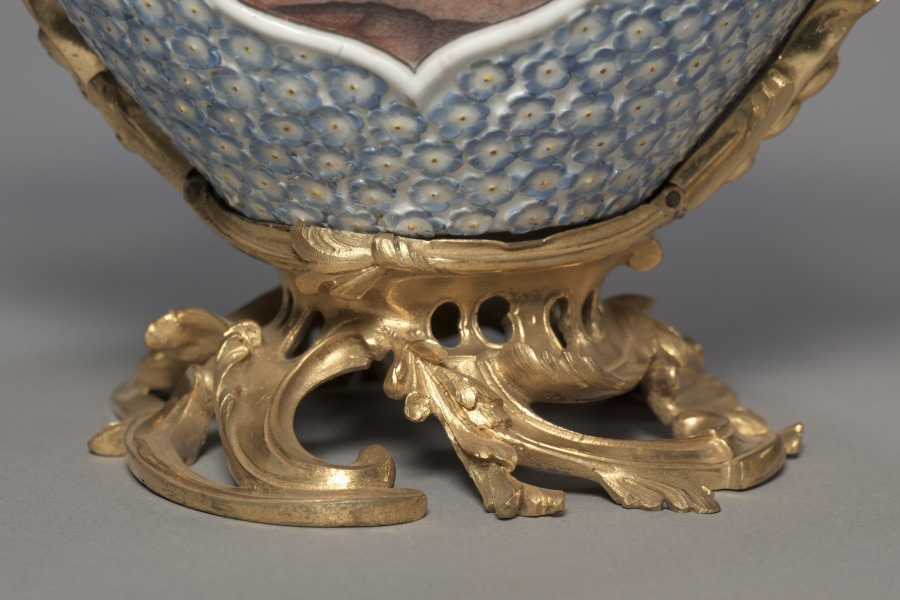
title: Vase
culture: Germany, 18th century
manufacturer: Meissen Porcelain Factory (German, est. c. 1710)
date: 1749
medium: porcelain mounted in gilt bronze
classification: Ceramic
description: One of these vases is dated 1749. They were perhaps part of a set of four covered vases that we know from documents were acquired by Mme. de Pompadour, mistress of Louis XV in 1752.